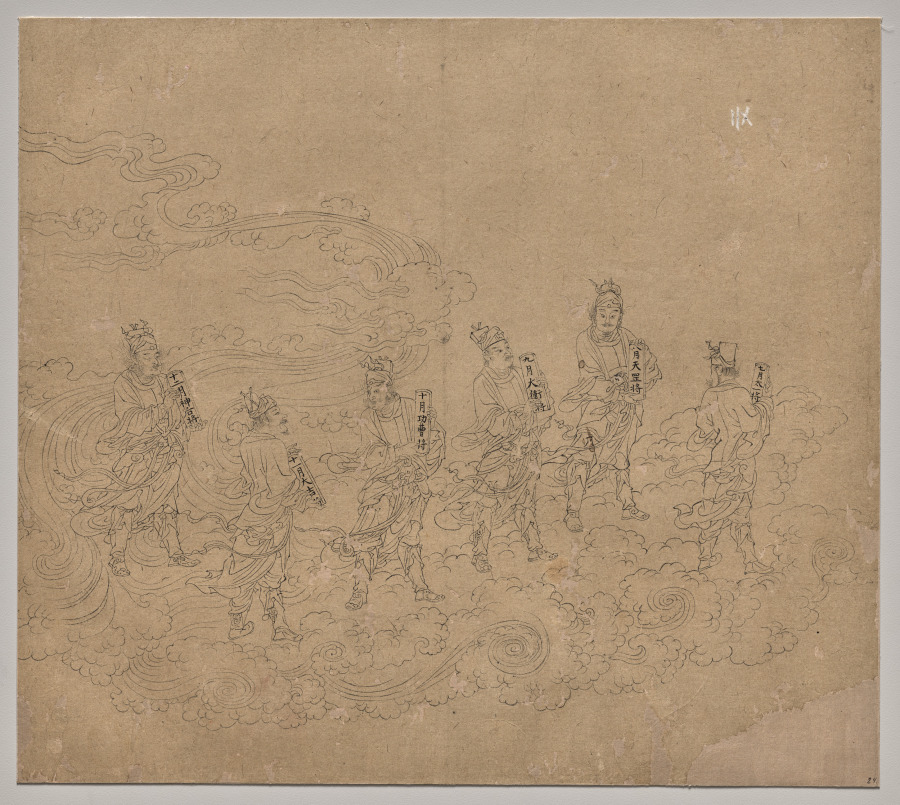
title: Album of Daoist and Buddhist Themes: Procession of Daoist Deities: Leaf 24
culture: China, Southern Song dynasty (1127-1279)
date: 1200s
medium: Album, ink on paper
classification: Painting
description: These six Daoist deities all carry plaques inscribed with their names. This leaf continues the series of half-officers for the seventh through twelfth months, ordered from right to left. Album leaf 23 has the six half-officers for the first to the sixth month of the cycle.